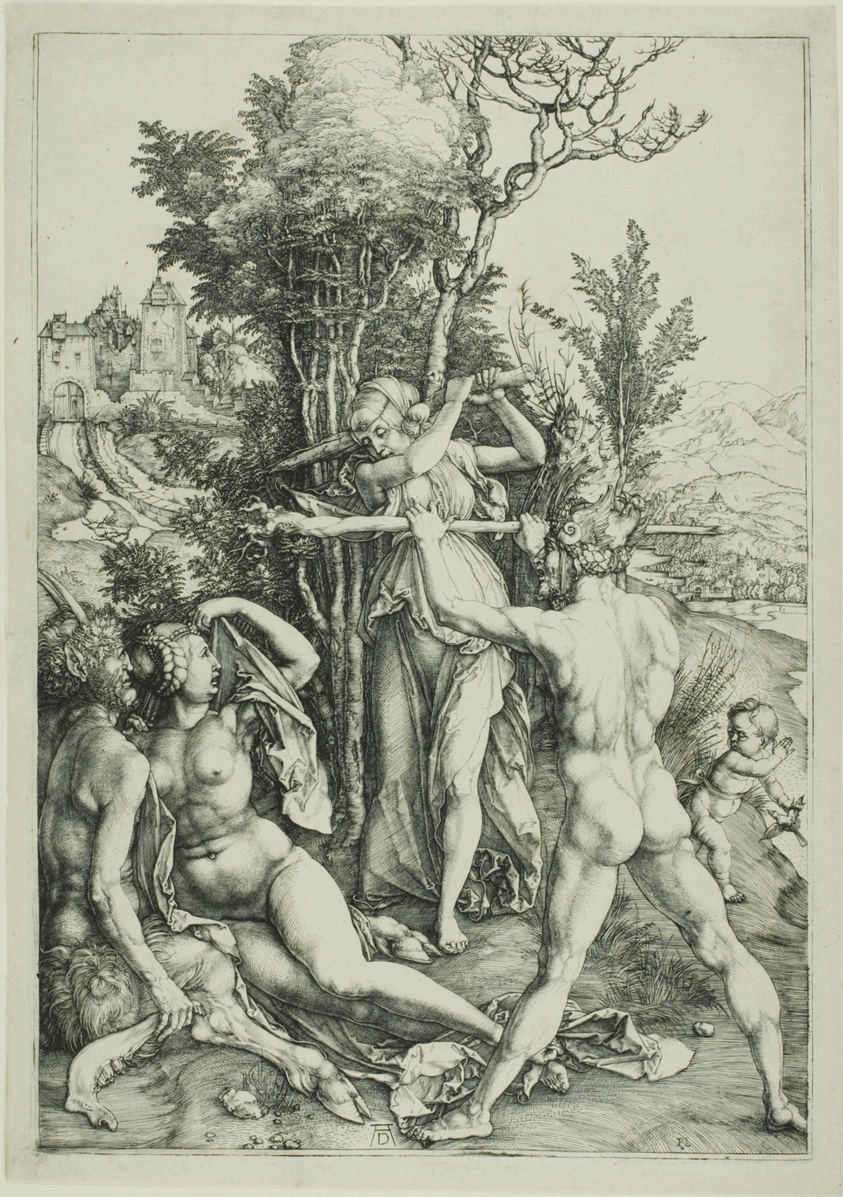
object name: Print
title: Hercules at the Crossroads (Jealousy)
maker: Albrecht Dürer (German, 1471-1528)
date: c. 1498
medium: Engraving in black on off-white laid paper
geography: Germany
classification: engraving; print; prints and drawing; paper